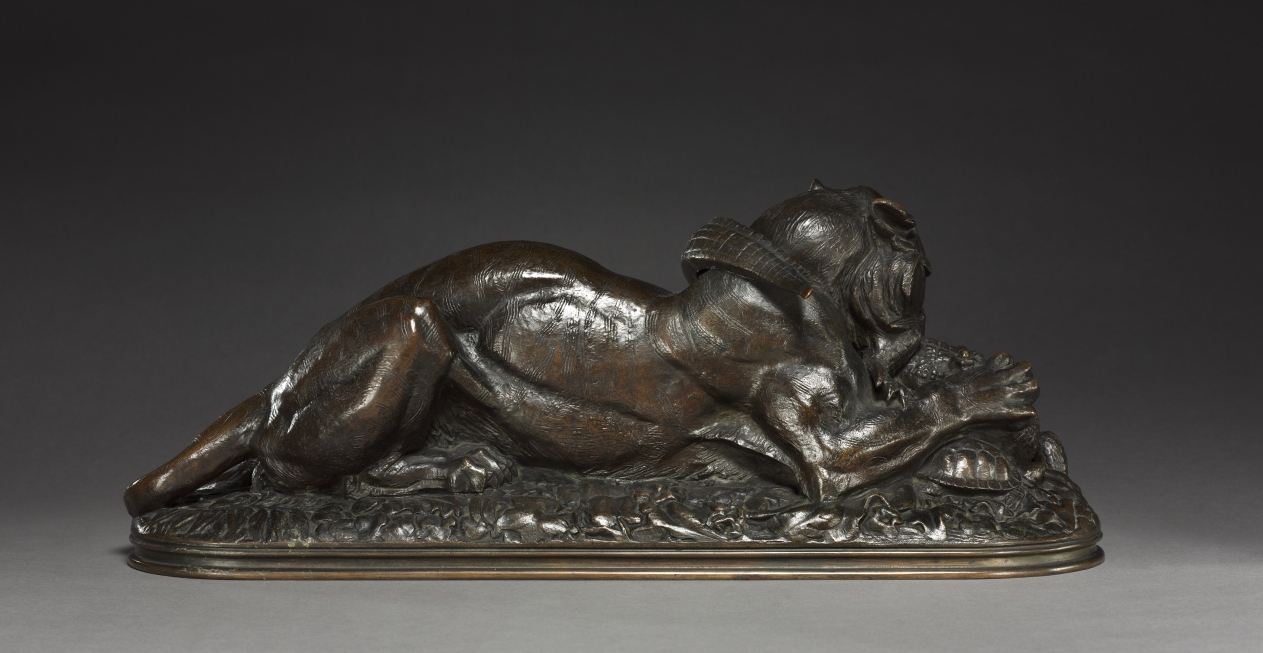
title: Tiger Devouring a Gavial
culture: France, 19th century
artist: Antoine-Louis Barye (French, 1796–1875)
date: 1831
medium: bronze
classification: Sculpture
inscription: Signed: "BARYE"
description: A large reptile of southern Asia, the gavial is related to and resembles a crocodile.